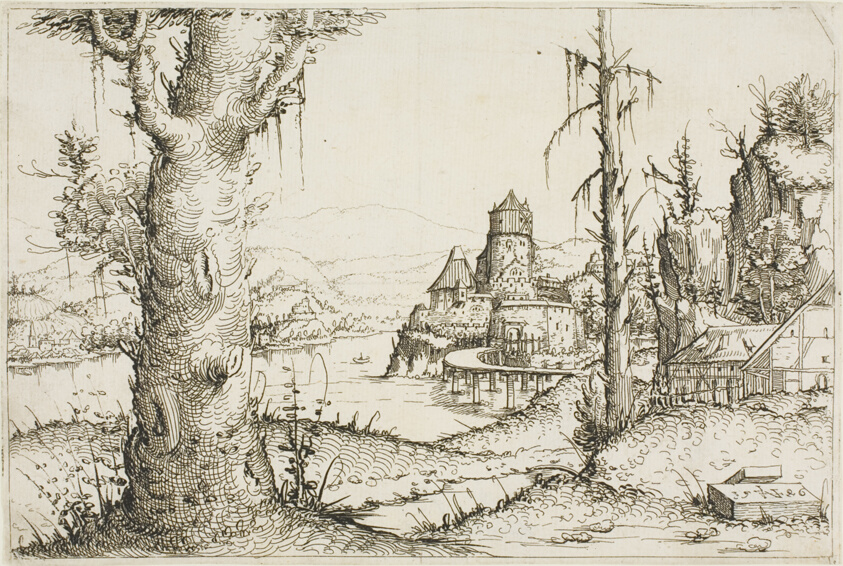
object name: Print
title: River Landscape with Large Tree in Foreground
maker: Augustin Hirschvogel (German, 1503-1553)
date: 1546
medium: Etching on paper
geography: Germany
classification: etching; print; prints and drawing